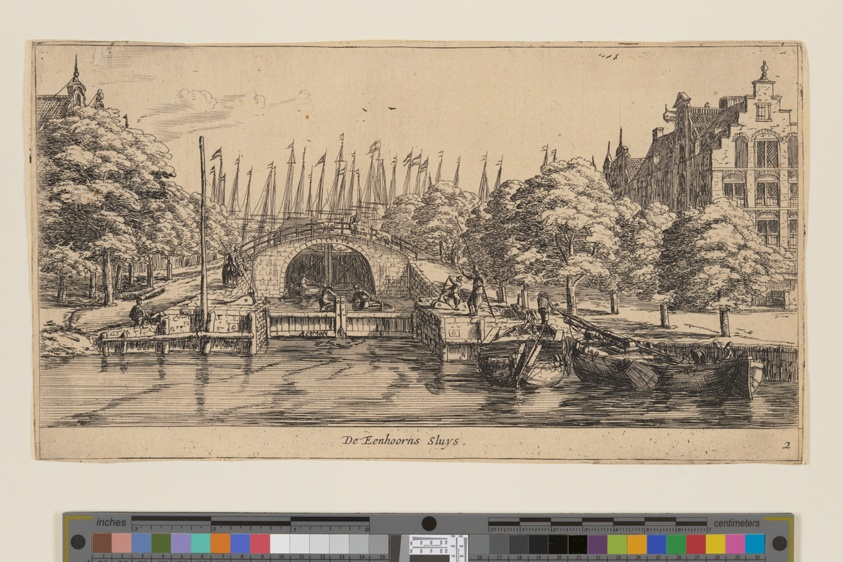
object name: Print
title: De Eenhorns Sluys, from Views of Amsterdam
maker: Reinier Nooms, called Zeeman (Dutch, c. 1623–1664)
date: c. 1660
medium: Etching on ivory laid paper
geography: Netherlands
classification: etching; paper; print; prints and drawing